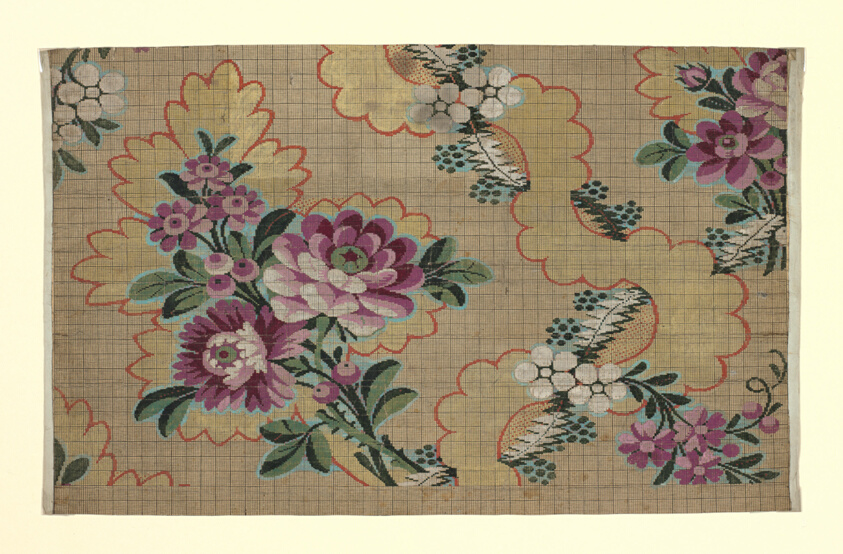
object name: Drawing and Watercolor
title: Mise-en-carte (Point-paper)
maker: France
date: 1760/90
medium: Ink and gouache on hand drawn graph paper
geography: France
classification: textile; accessory - paper design